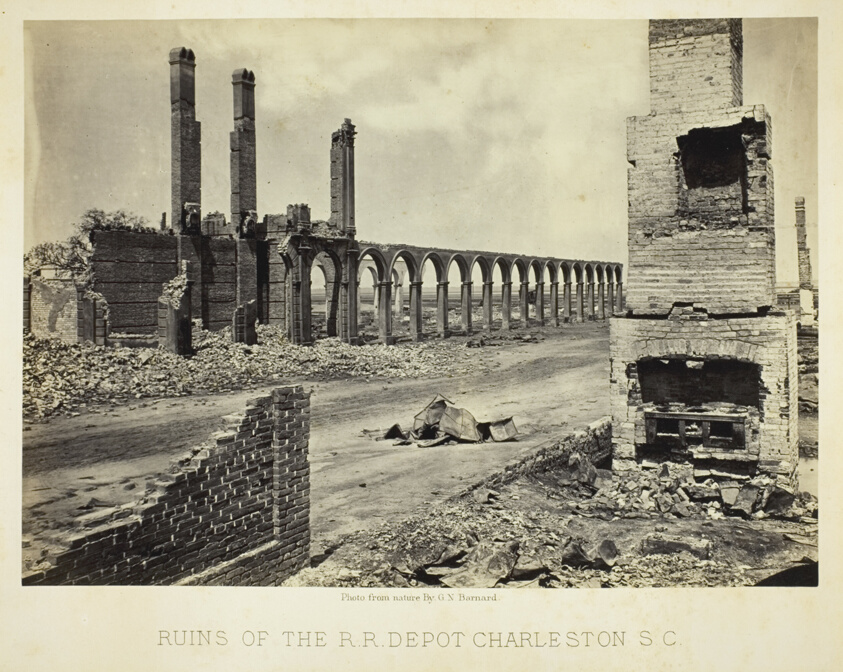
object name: Photograph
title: Ruins of the R.R. Depot Charleston, S.C.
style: 19th century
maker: George N. Barnard (American, 1819–1902)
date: 1865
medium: Albumen print, plate 61 from the album "Photographic Views of the Sherman Campaign" (1866)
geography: United States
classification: albumen silver print; photographic process; photography; photograph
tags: Collected by Hugh Edwards, Sherman's Campaign 1866